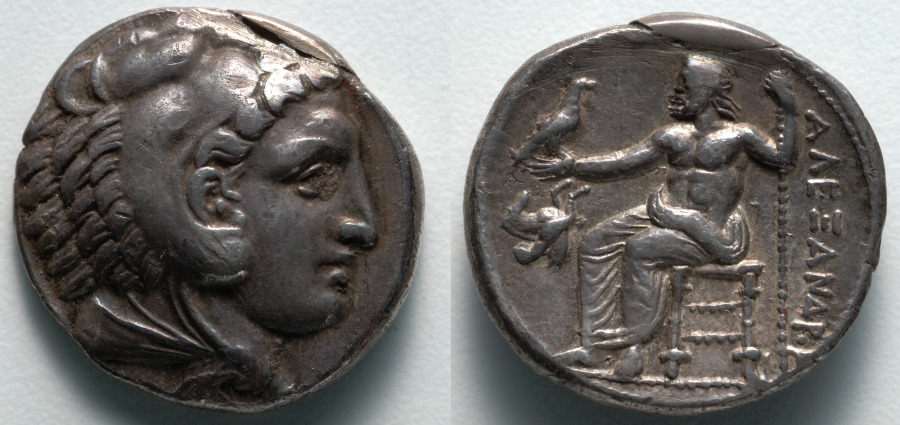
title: Tetradrachm: Head of Young Herakles (obverse); Zeus (reverse)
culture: Greek, Macedonian, minted at Amphipolis (Macedonia), reign of Alexander III [The Great]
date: 336–323 BCE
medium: silver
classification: Coins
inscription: ΑΛΕΞΑΝΔΡΟΥ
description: On this coin, the head of a youthful Herakles, wearing his lion-skin, appears on the obverse, with his father Zeus, king of the gods, seated on the reverse. For Alexander III (the Great), who claimed descent from the line of Herakles, coins like this one projected power. Thus, while their attributes (lion-skin, eagle, scepter) identify hero and god, the inscription ΑΛΕΞΑΝΔΡΟΥ (of Alexander) identifies the leader.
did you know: The Pegasos protome beside Zeus (on the reverse) indicates that this coin was minted at Amphipolis.